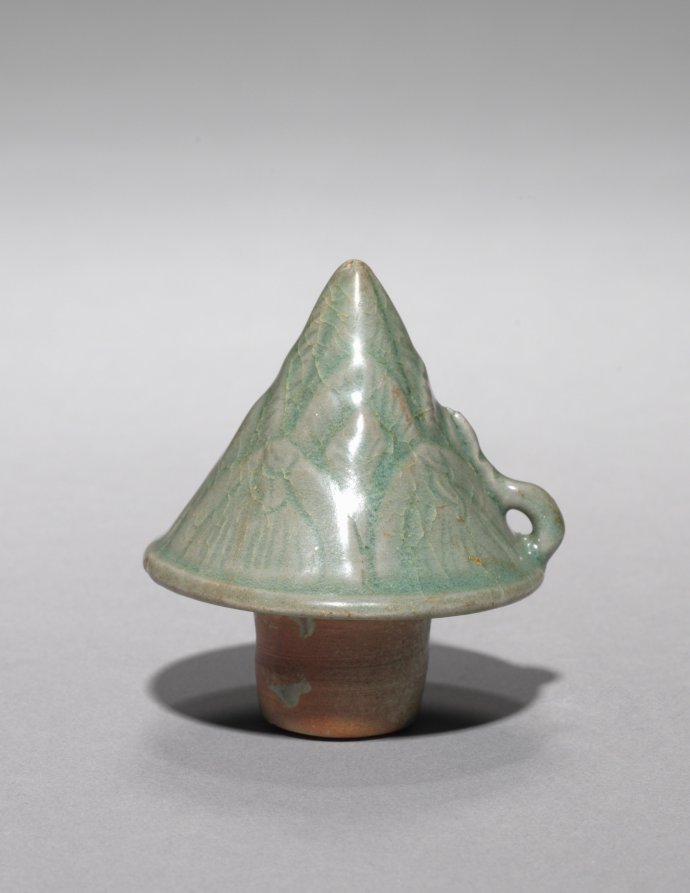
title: Lid for Bamboo Shoot-shaped Ewer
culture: Korea, Goryeo dynasty (918–1392)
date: 1100s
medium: earthenware with carved designs and celadon glaze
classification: Ceramic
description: Natural motifs inspired both the shape of celadon vessels as well as their inlaid designs in the Goryeo period. This wine ewer is shaped like a bamboo shoot, but it also resembles a lotus bud. Even though the spout was repaired, the ewer is a celadon masterpiece of the Goryeo period.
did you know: This lid was donated in 1998 for the bamboo-shaped wine pitcher (CMA 1928.179), but it turned out to be too big.